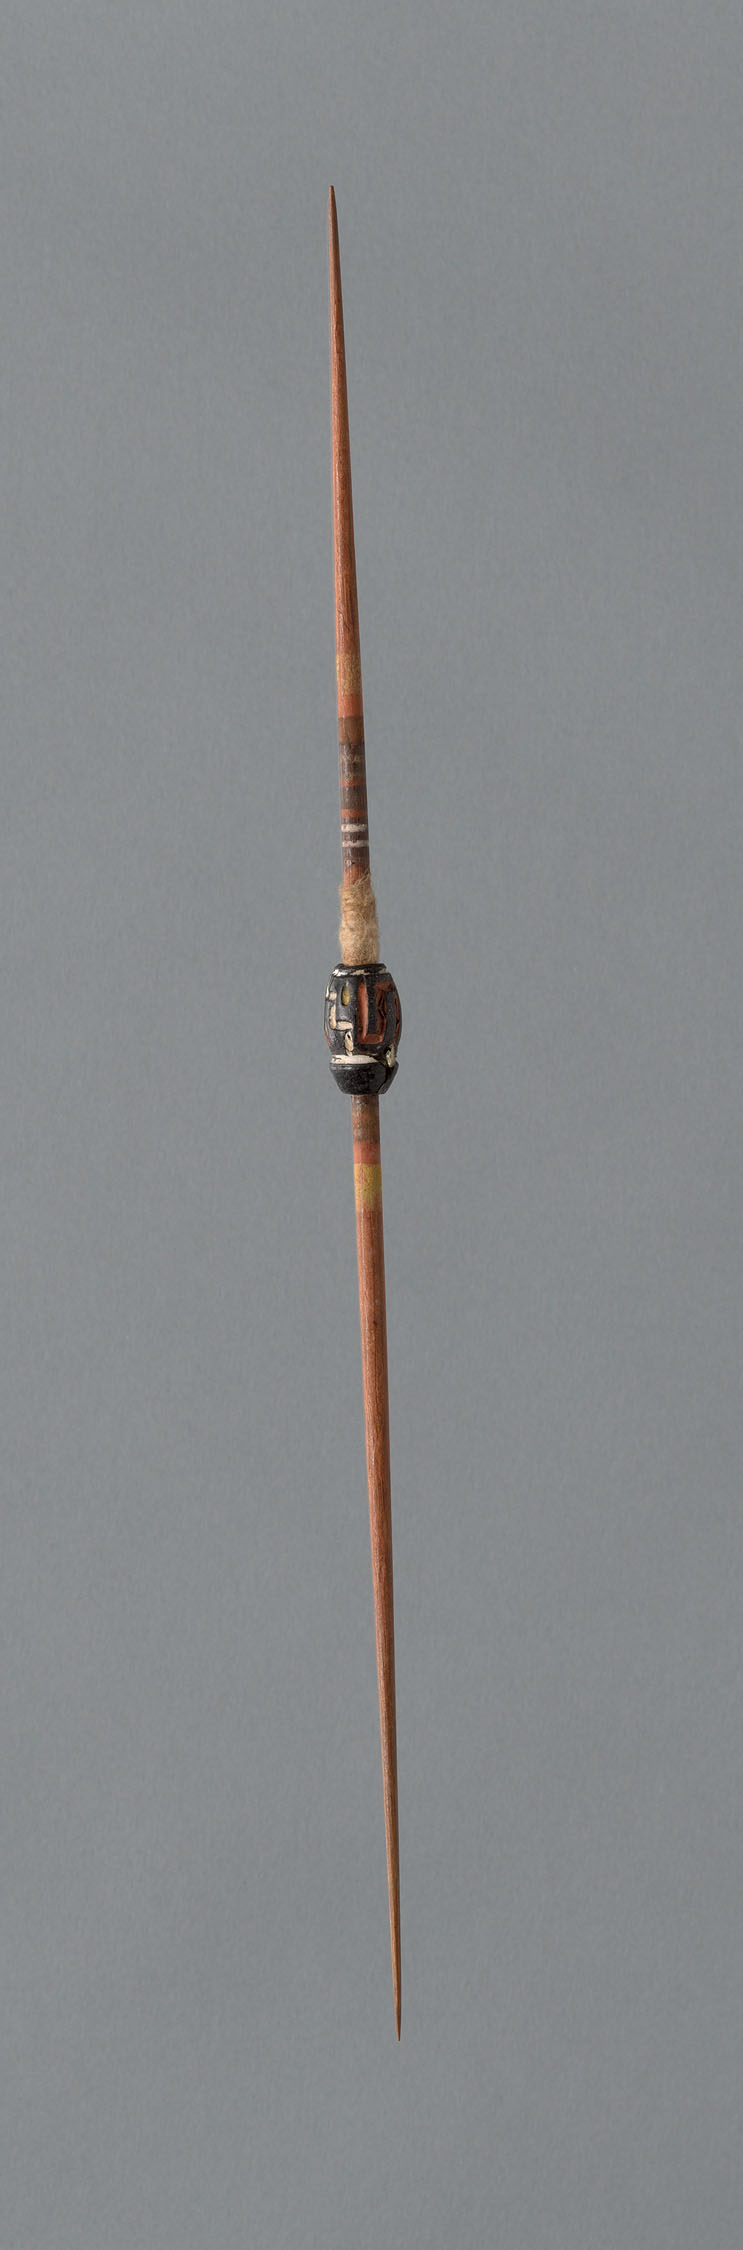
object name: non-art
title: Wooden Spindle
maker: Peru, Possibly central coast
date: 1000/1476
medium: Wood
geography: Peru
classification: spindles (textile working equipment); textile working equipment; accessories (object genre); textile